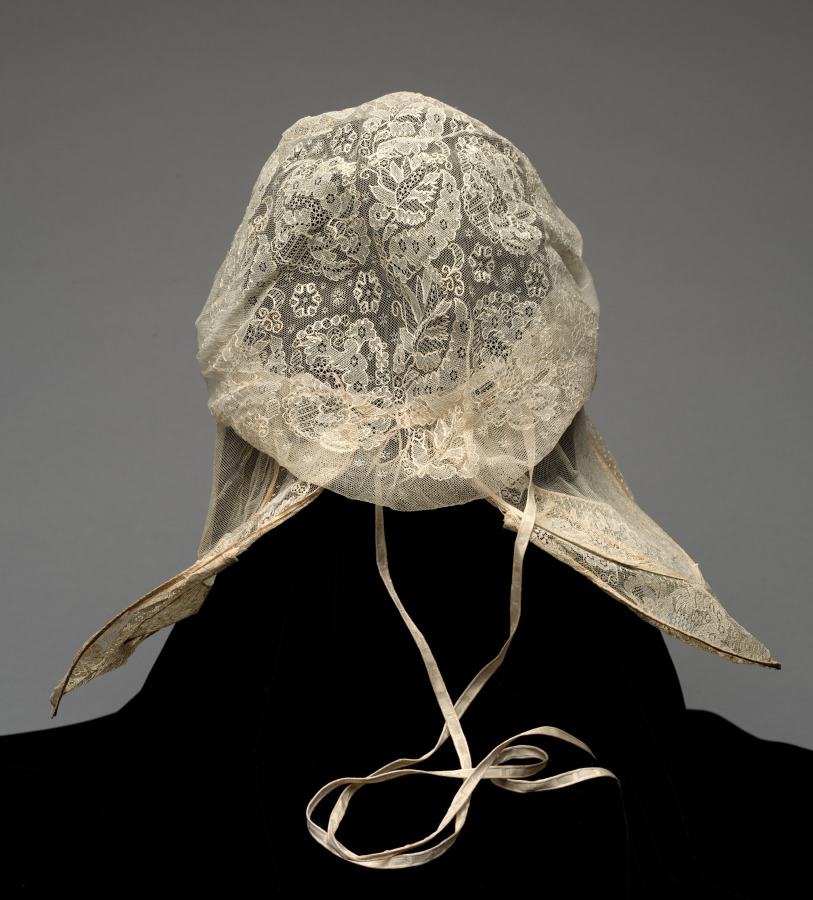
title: Lace Cap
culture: Netherlands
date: 1800s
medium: Net lace, embroidered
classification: Garment